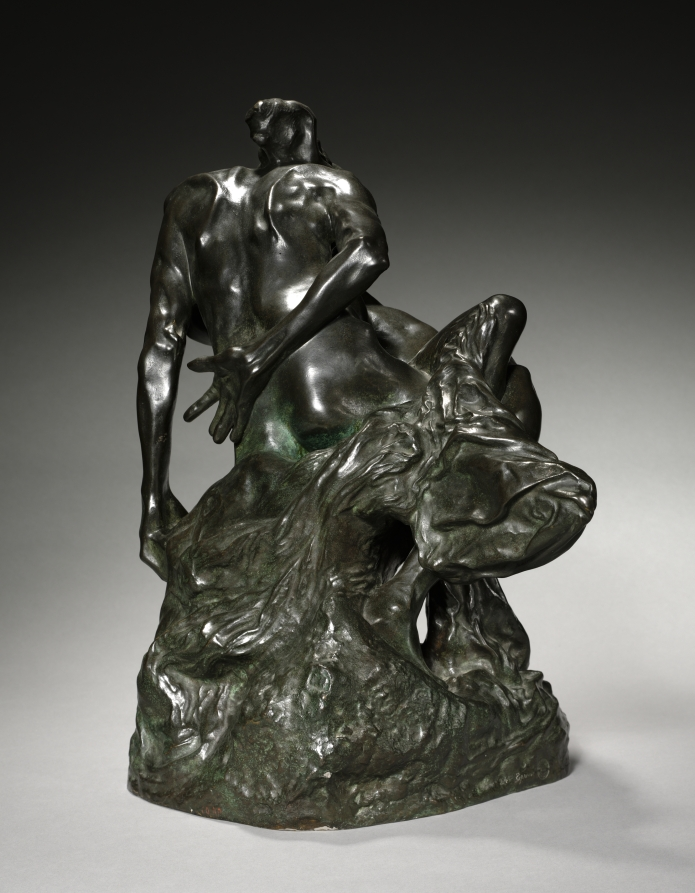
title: Triumphant Youth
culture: France, 19th century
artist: Auguste Rodin (French, 1840–1917)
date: c. 1894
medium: bronze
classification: Sculpture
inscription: Signed front left: "A. Rodin"